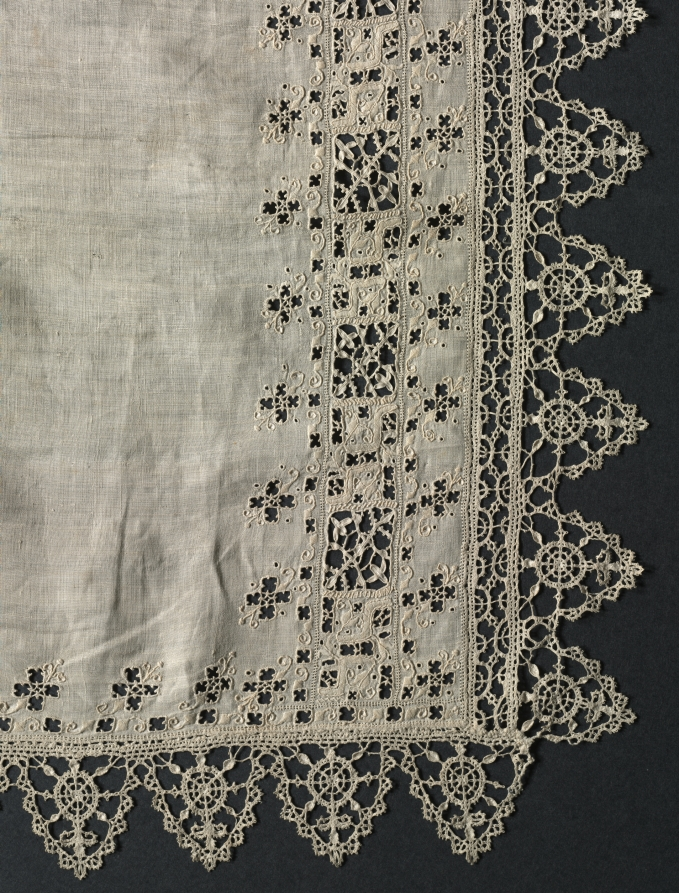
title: Altar Frontal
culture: Italy, Genoa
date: 1500s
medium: Linen: needle lace (cutwork) and bobbin lace edging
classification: Lace